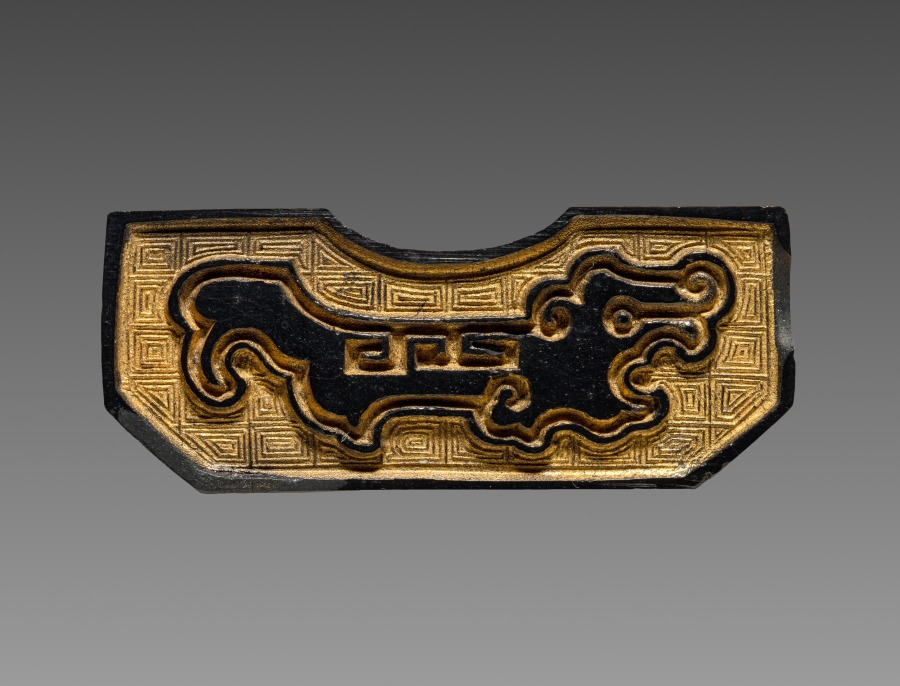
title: Ink Cake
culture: China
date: 1800s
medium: ink cake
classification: Miscellaneous